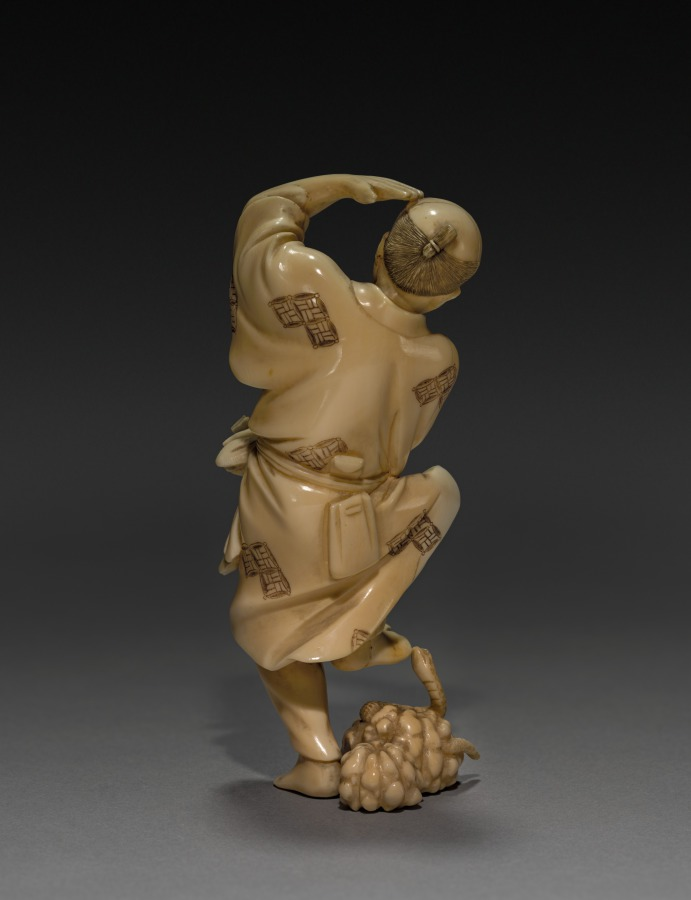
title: Man and Serpent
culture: Japan, Meiji period (1868–1912)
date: early 1900s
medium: ivory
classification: Ivory